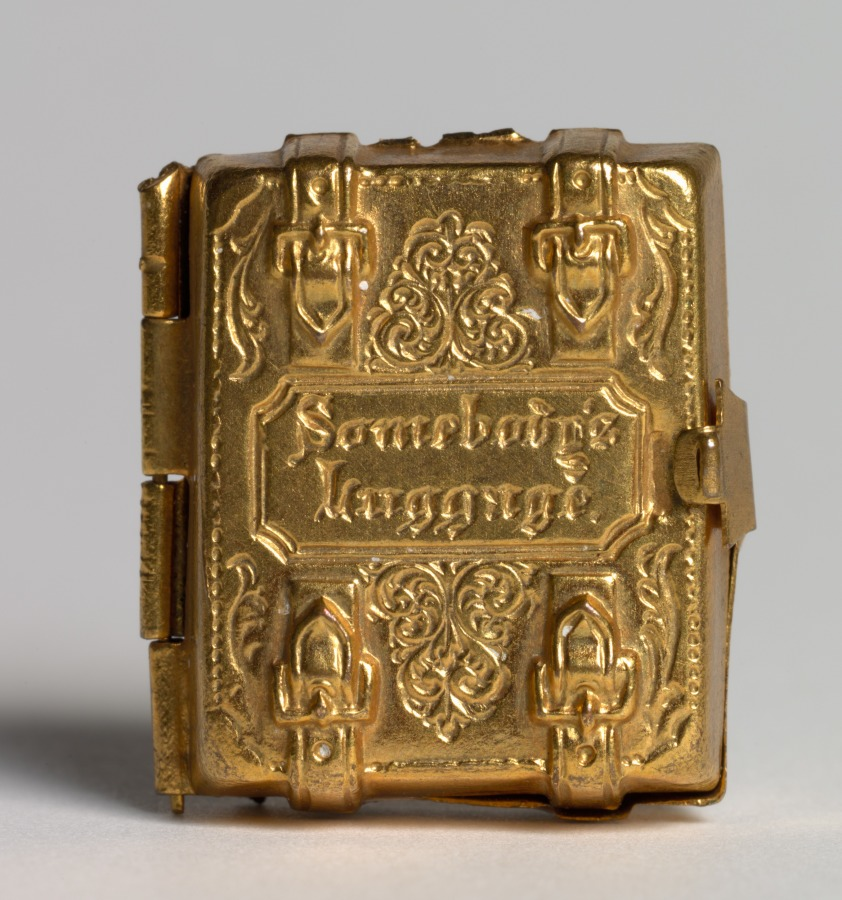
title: Somebody's Luggage (Miniature Wedding Album of Tom Thumb and Lavinia Warren)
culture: America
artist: Mathew Brady (American, 1823–1896)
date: c. 1863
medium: brass photographic locket with 12 miniature albumen prints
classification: Jewelry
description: This deluxe commercial souvenir commemorates the marriage of “General” Tom Thumb (Charles Sherwood Stratton) and Lavinia Warren, performers at P. T. Barnum’s American Museum. Thumb was such a celebrity that the wedding pushed the Civil War off newspapers’ front pages for days. Cartes-de-visite of the wedding sold in the thousands; Brady even licensed the image to lithographers and other photographers. In one image, Lavinia holds a baby who was borrowed for the photo shoot to suggest her domestic skills. The locket is shaped like a miniature suitcase bearing the words “Somebody’s Luggage,” the title of an 1862 story by Charles Dickens.